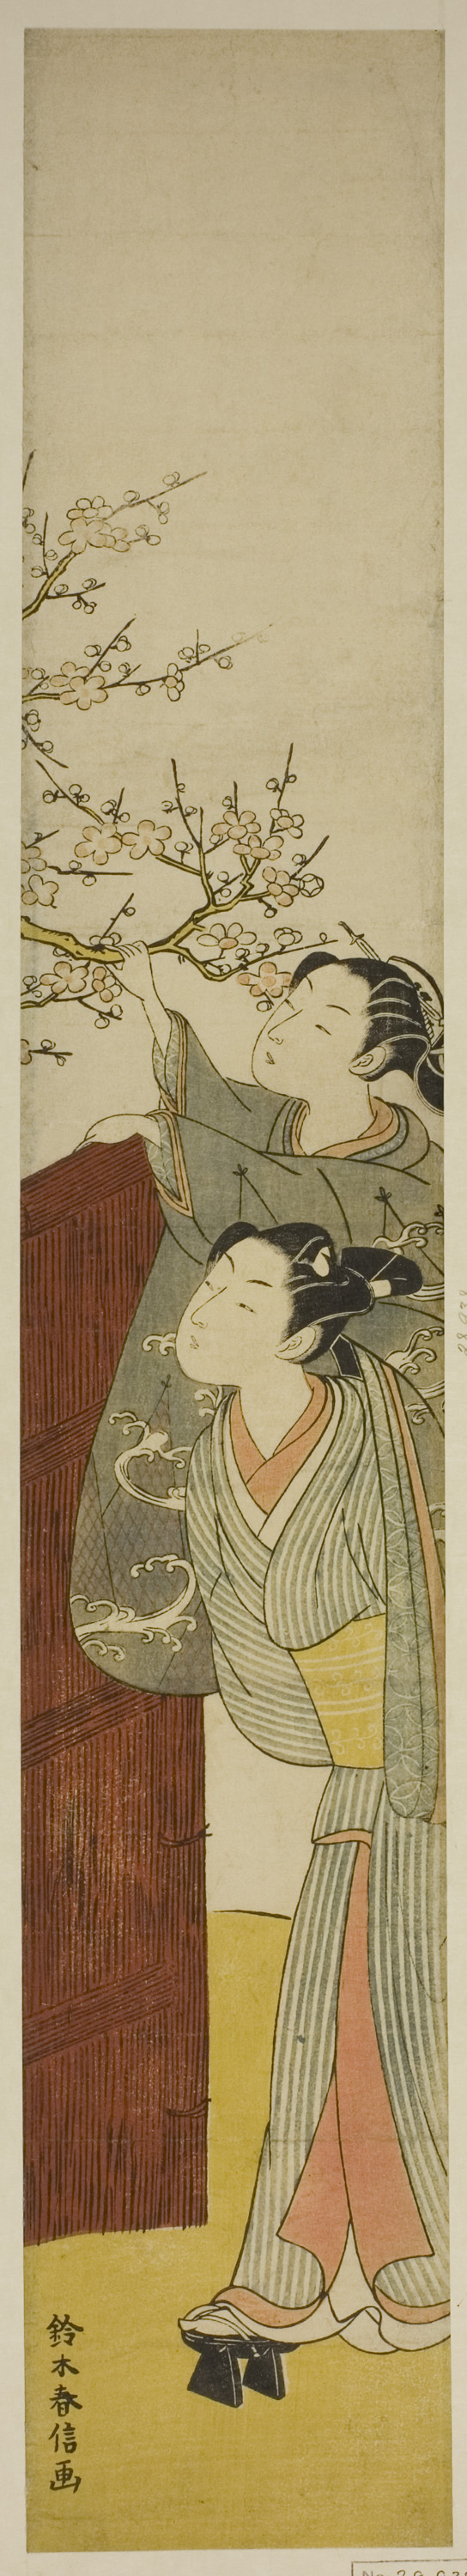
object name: Print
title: Picking a Plum Branch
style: Japanese (culture or style)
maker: Suzuki Harunobu 鈴木 春信; Japanese, 1725 (?)-1770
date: c. 1767/68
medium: Color woodblock print; hashira-e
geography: Japan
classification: woodblock print; print; asian art